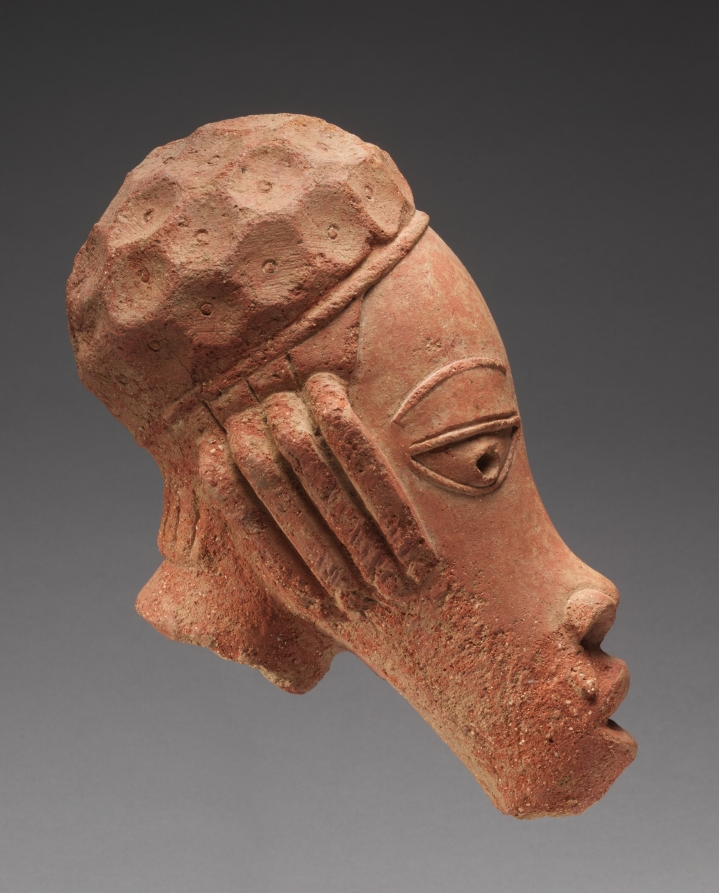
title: Head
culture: Africa, West Africa, Nigeria, Nok-culture style region, unknown female ceramicist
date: thermoluminescence date 20–620 CE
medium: terracotta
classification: Sculpture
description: More than 500 such sculptures—often full figures with elaborate hairstyles and jewelry— have been found in central Nigeria. Named after a discovery site, Nok culture (500 BCE–200 CE or 1500–1 BCE) produced the earliest large figurative artworks in Africa outside of Egypt. Little was known about their social context, as they were first found in mining deposits in the 1920s. Archaeological excavations conducted in the 2000s by a German-Nigerian team suggest that many sculptures were deliberately broken and placed under pavements and in pits, indicating ritual practice. Male-centered art histories presumed men made these figurative sculptures; however, they incorporate building and firing techniques practiced only by women.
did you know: This complete head’s bold modeling, deliberate asymmetry, and sensitive expression make it one of the finest known examples of Nok sculpture.